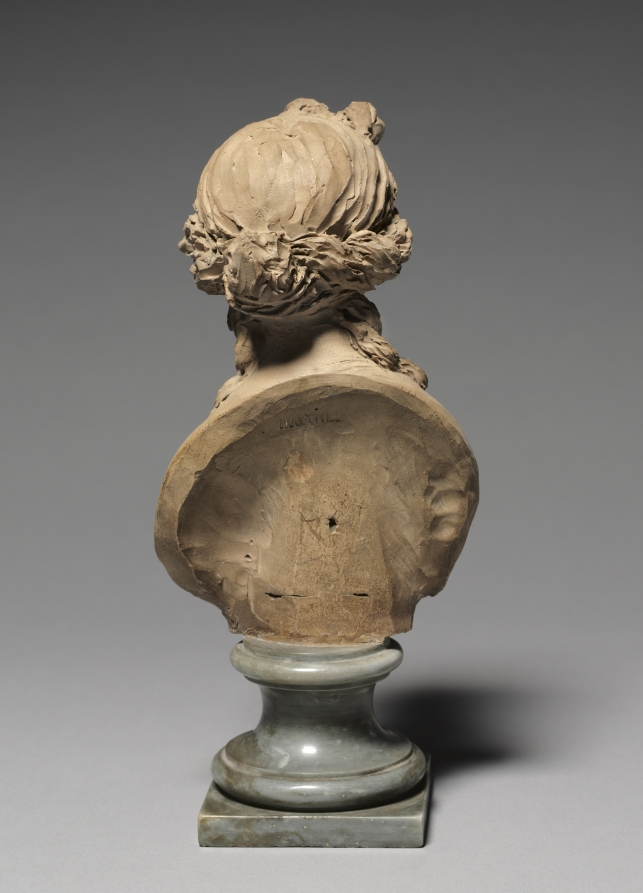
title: Bust of a Woman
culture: France, 19th century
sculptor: Joseph-Charles Marin (French, 1759–1834)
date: 1800–1834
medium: terracotta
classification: Sculpture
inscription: inscribed, back of sculpture below neck: Marin.